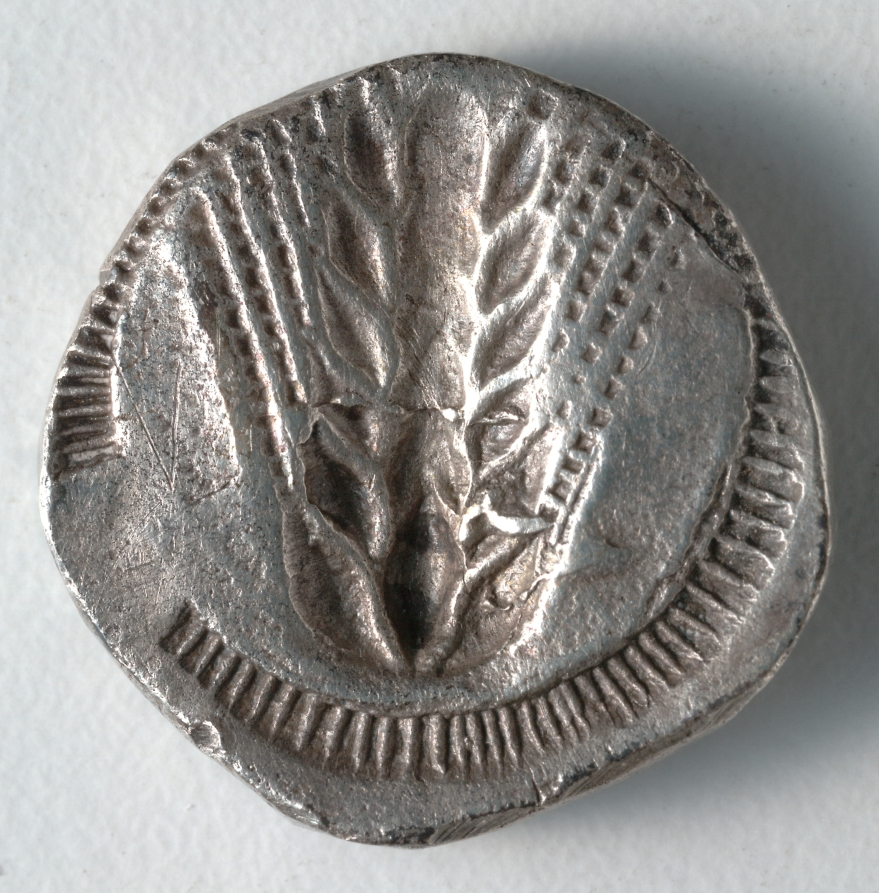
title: Stater: Barley, Incuse (reverse)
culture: Greek, minted at Metapontion (South Italy)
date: c. 530–510 BCE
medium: silver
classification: Coins